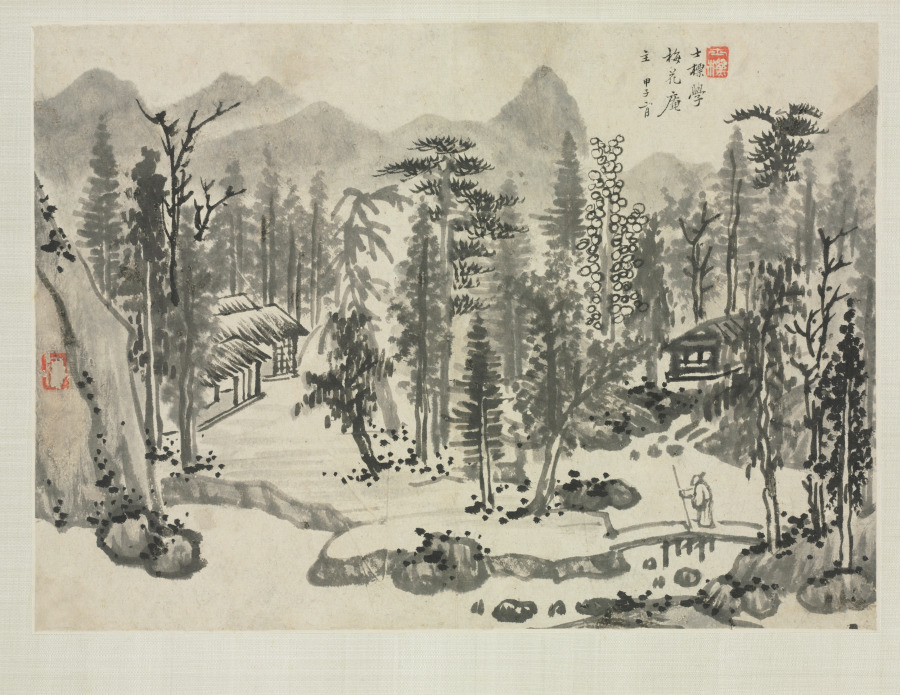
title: Landscape Album in Various Styles: Landscape after Wu Zhen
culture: China, Qing dynasty (1644-1911)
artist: Zha Shibiao (Chinese, 1615–1698)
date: 1684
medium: album leaf, ink and light color on paper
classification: Painting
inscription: Artist's inscription, signature, and seal: [seal] Shibiao. Shibiao imitating the Master of the Plum-Blossom Hut [Wu Zhen], second month of the jaizi year [1684].